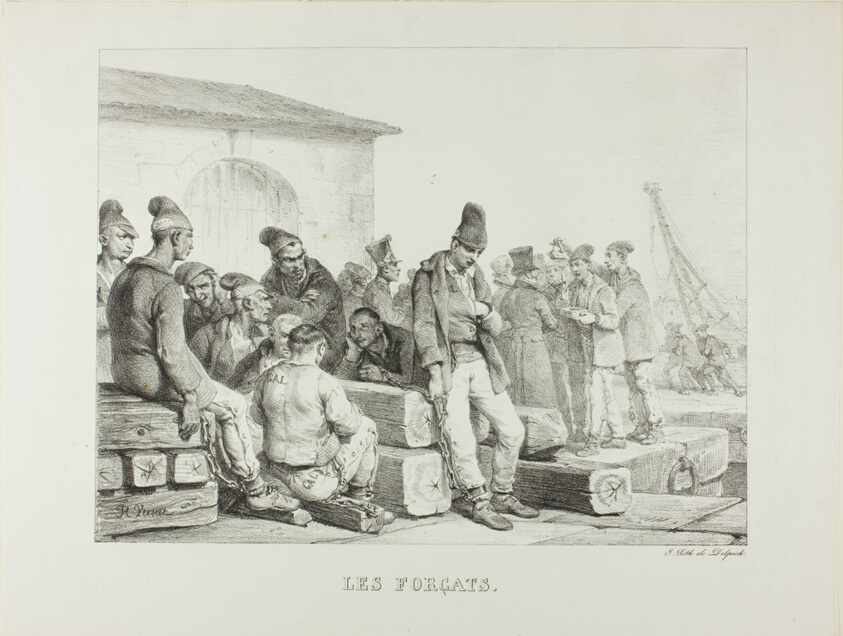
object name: Print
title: Convicts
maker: Horace Vernet (French, 1789-1863); printed by François Seraphin Delpech (French, 1778-1825)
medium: Lithograph in black on ivory wove paper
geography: France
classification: lithograph; print; prints and drawing